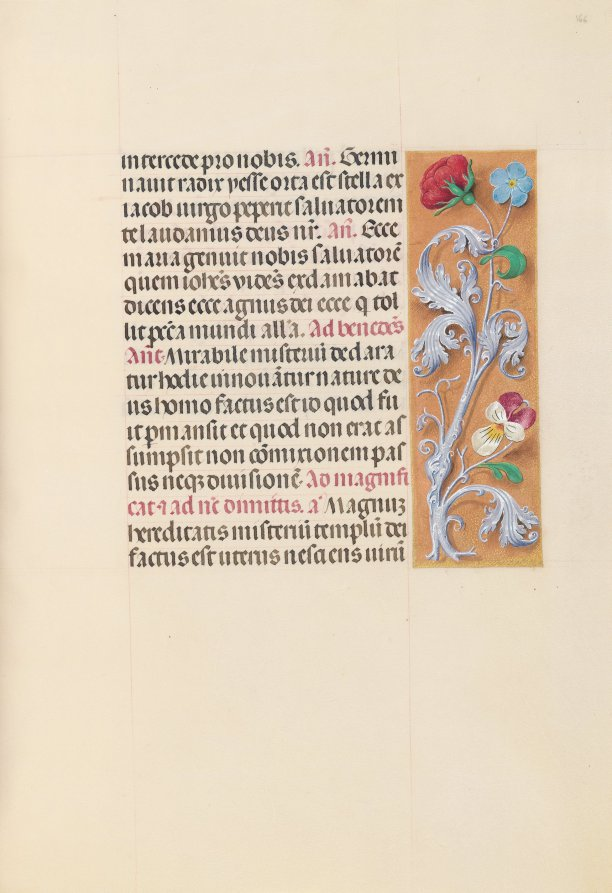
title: Hours of Queen Isabella the Catholic, Queen of Spain: Fol. 166r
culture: Flanders, Ghent and Bruges, late 15th century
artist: Master of the First Prayerbook of Maximillian (Flemish, c. 1444–1519)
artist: and Associates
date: c. 1500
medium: ink, tempera, and gold on vellum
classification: Bound Volume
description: This manuscript was illuminated by a circle of at least five highly organized manuscript painters active in the Flemish cities of Ghent and Bruges. The principal illuminator was Alexander Bening, who painted the majority of the book's miniatures. Manuscripts produced by this circle of artists are renowned for the decoration of their borders, which typically feature a rich variety of realistically-painted flowers, birds, and butterflies. This prayer book, called a book of hours, was intended not for a cleric, but for the private devotions of a lay person-in this case, Isabella the Catholic, Queen of Spain (1451-1504). Isabella's coat of arms embellishes the book's frontispiece. It is unlikely that the book was commissioned by the Queen herself; rather, she probably received it as a diplomatic gift from someone courting her patronage, perhaps Cardinal Francisco Jimenez de Cisneros. A Franciscan friar, Jimenez was dependent upon Isabella for his advancement, first to the post of Queen's confessor in 1492, and then to Archbishop of Toledo in 1495.